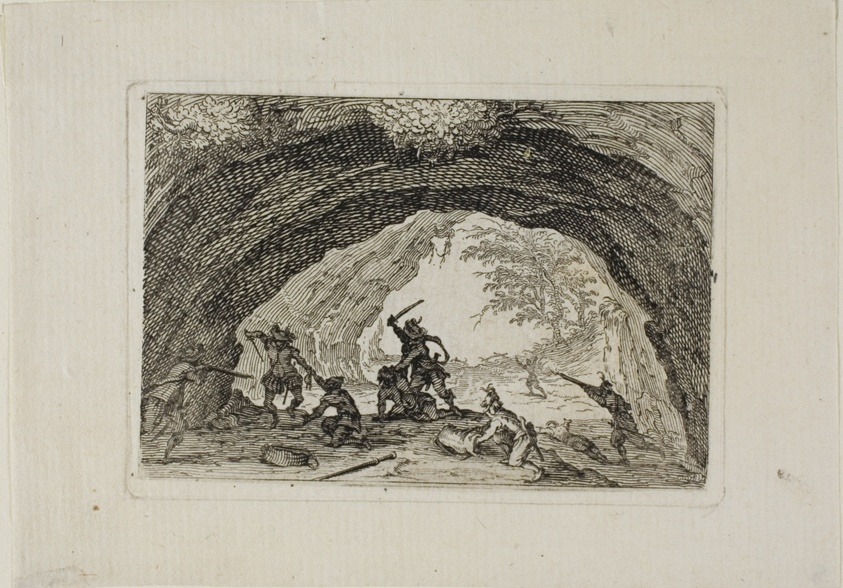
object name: Print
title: The Cavern of Brigands, from The Caprices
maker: Jacques Callot (French, 1592-1635)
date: c. 1622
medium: Etching on ivory laid paper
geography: France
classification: etching; print; prints and drawing